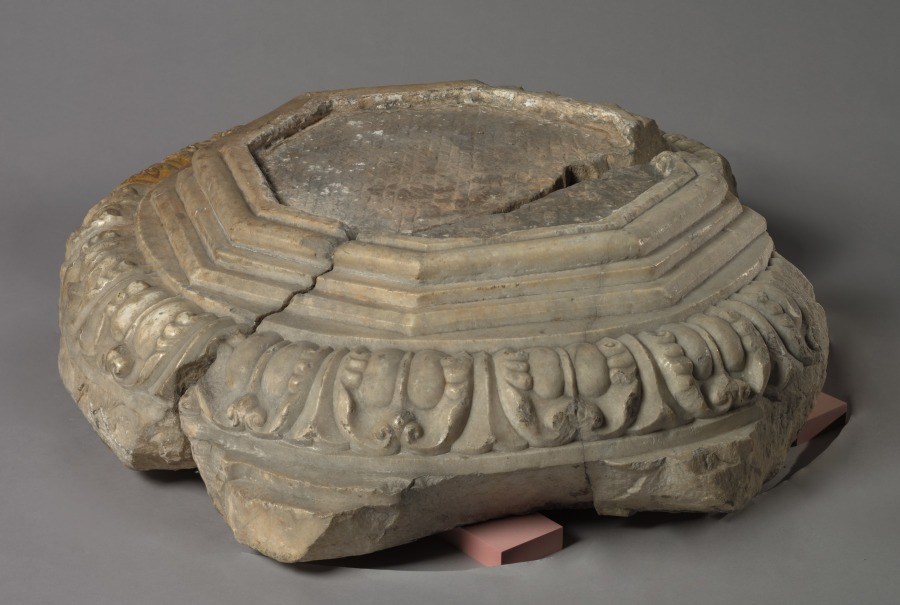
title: Fang Xuanling Pedestal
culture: China, Tang dynasty (618-907)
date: 647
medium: marble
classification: Sculpture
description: This double lotus pedestal exhibits the rich, ornate style of early Tang sculpture. It was commissioned by the Duke of Liang, Fang Xuanling (578–648), for the blessing of his second son and daughter-in-law, the Tang imperial princess of Gaoyang. The iconography and inscription suggest that it originally went with a statue, now missing, of Shakyamuni, the historical Buddha, instead of Amitayus. Today the pedestal is topped with Amitayus, the Buddha of Infinite Life, seated in meditation. Although the pedestal was not made with the statue, the combination is faithful to the original artistic conception.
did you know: In front, the top layer of the pedestal has an abstract curvilinear motif suggesting drapery; the rear is carved with a flower-and-leaf motif.